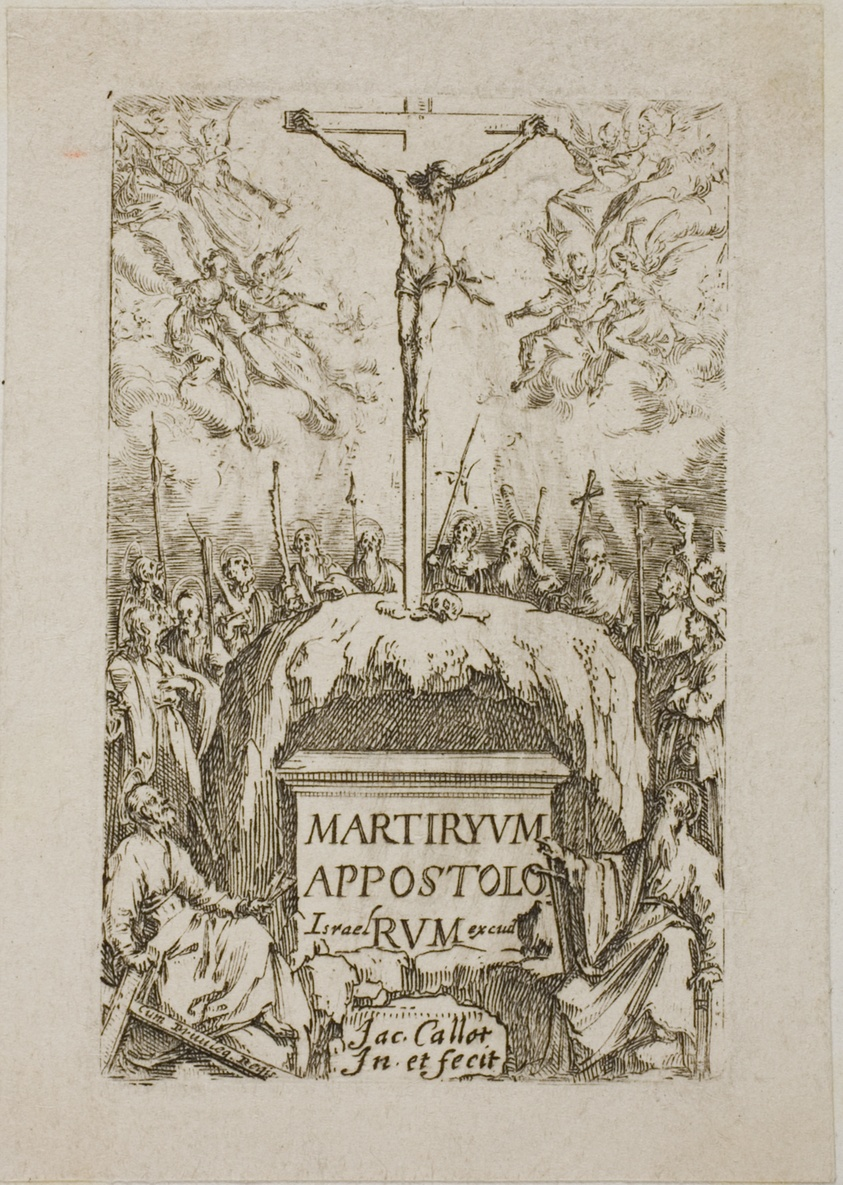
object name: Print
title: Frontispiece, from The Martyrdoms of the Apostles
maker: Jacques Callot (French, 1592-1635)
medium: Etching on paper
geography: France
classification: etching; print; prints and drawing